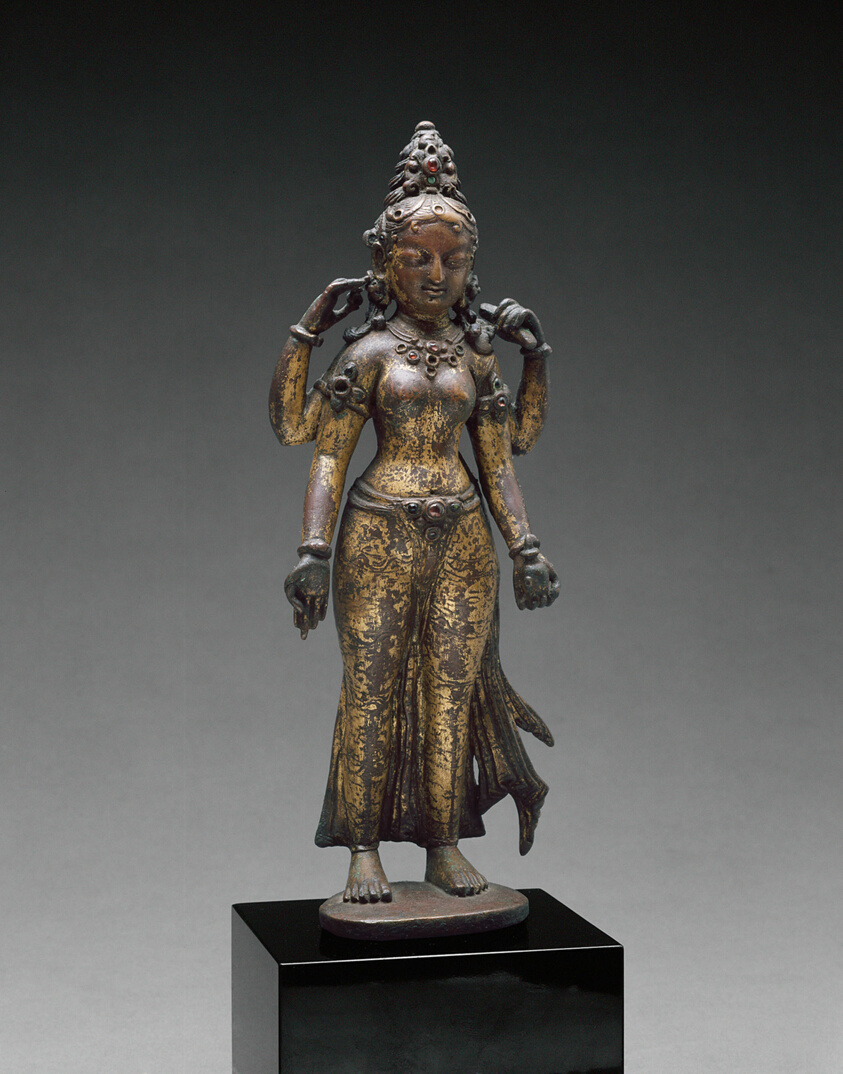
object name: Sculpture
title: Sarasvati, Goddess of Wisdom, Holding a Book and a Water Pot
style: Himalayan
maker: Nepal; Kathmandu Valley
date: 10th century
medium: Gilt copper alloy with semiprecious stones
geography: Kathmandu Valley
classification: copper; metal; sculpture; asian art